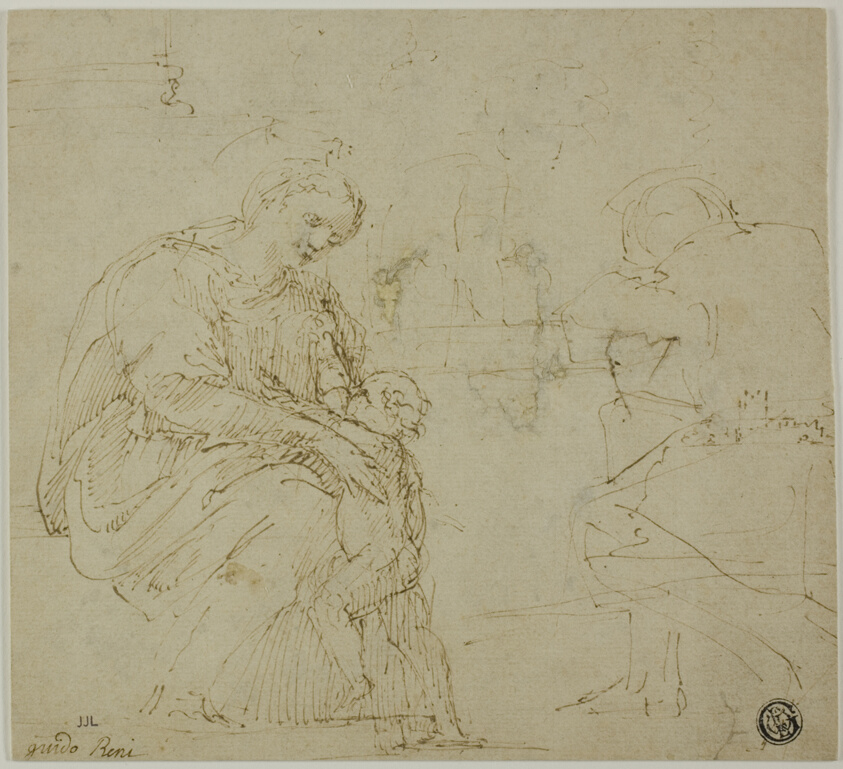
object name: Drawing and Watercolor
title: Sketches of Virgin and Child, Seated Figure, and Landscape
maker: Attributed to Vincenzo Tamagni; Italian, 1492-c. 1530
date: c. 1530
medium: Pen and brown ink on tan laid paper, laid down on cream wove board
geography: Italy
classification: pen and ink drawings; drawings (visual works); prints and drawing